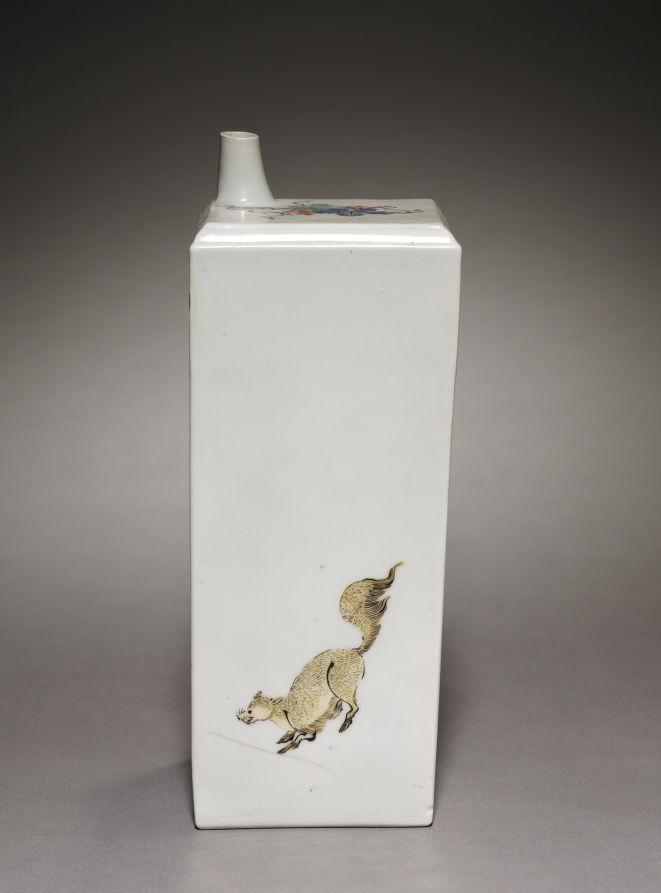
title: Square Bottle with Squirrel and Grapes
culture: Japan, Edo period (1615–1868)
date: late 1600s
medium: porcelain with overglaze color enamel (possibly Hizen ware, Kakiemon type)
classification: Ceramic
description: In the 1600s, Korean and Japanese elites could enjoy wine from Europe. In his 1636 travel diary called Haecharok, Kim Seryeom, a vice director of Korean envoys to Japan, recorded that the head of Japan’s Tsusima Island treated him to Western red wine. Therefore, export porcelain ware like Square Bottle with Squirrel and Grapes could have been made as a wine bottle.